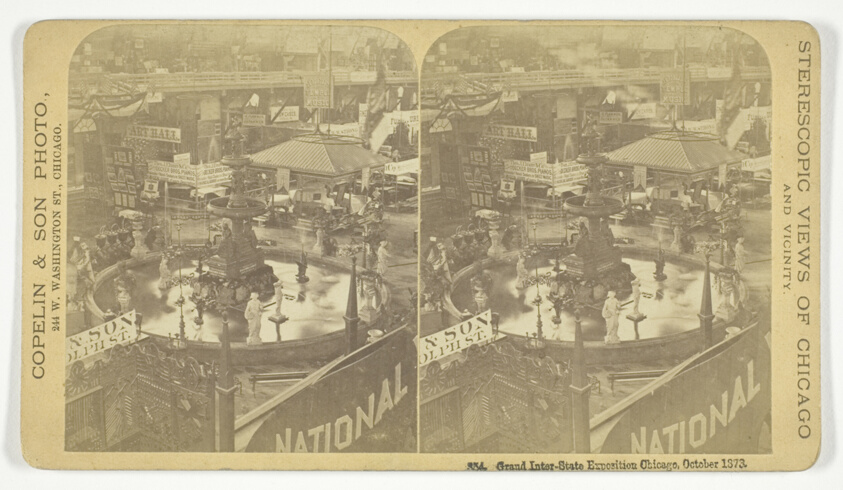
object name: Photograph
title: Grand Inter-State Exposition, Chicago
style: 19th century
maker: Copelin and Son (American, active late 19th century)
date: October 1873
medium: Gelatin silver prints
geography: United States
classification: photography; photograph